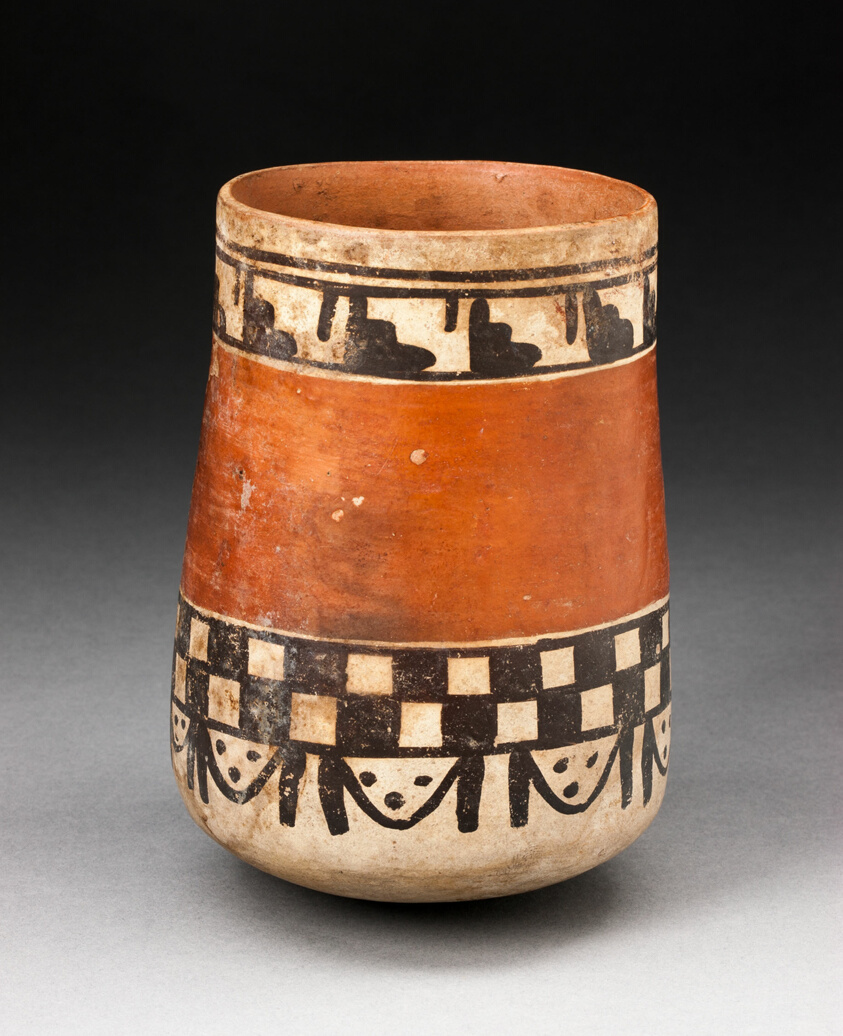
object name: Vessel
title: Beaker with Bands of Geometric Motifs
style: nazca, early intermediate period, Pre-Columbian, americas, Arts of the Americas, andean, andes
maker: Nazca; South coast, Peru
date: 180 BCE–500 CE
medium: Ceramic and pigment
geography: Nazca Valley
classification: earthenware; art of the americas; ceramics; vessel